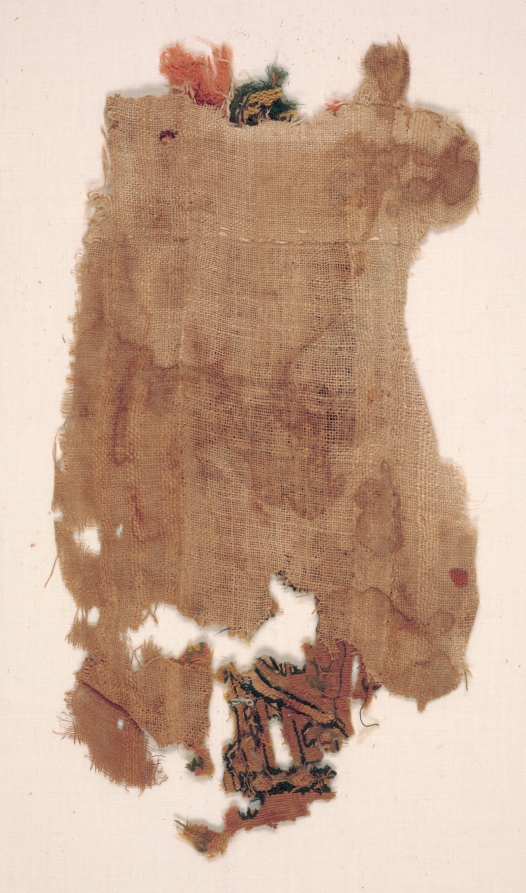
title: Tunic Ornament with Part of a Saint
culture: Egypt, c. 7th - 8th century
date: c. 600s - 700s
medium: tabby weave with inwoven tapestry ornament, linen and wool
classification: Textile